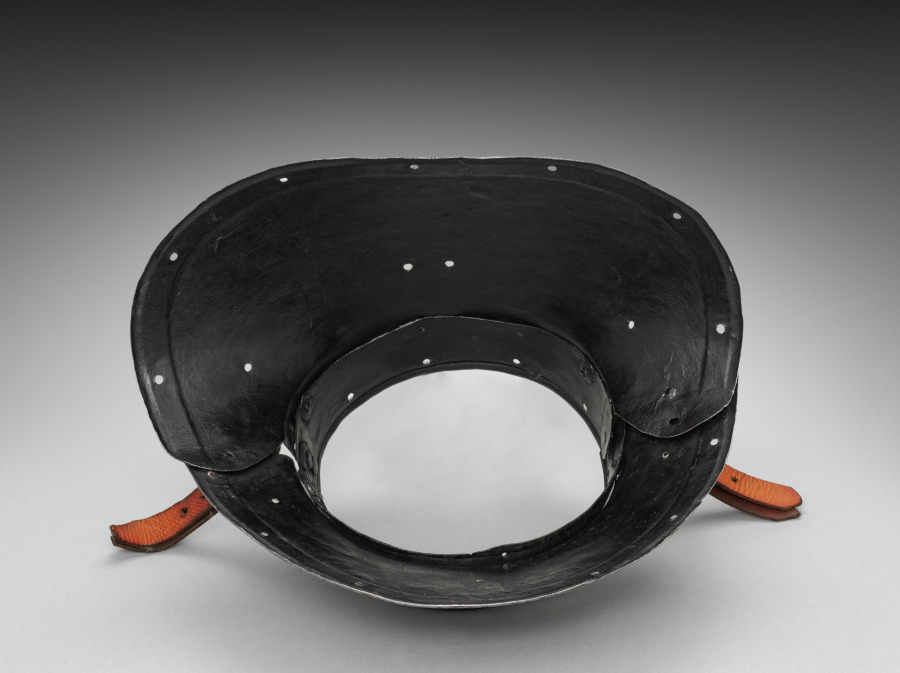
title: Colletin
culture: Germany, 19th century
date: 1801–1900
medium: steel with black paint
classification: Arms and Armor